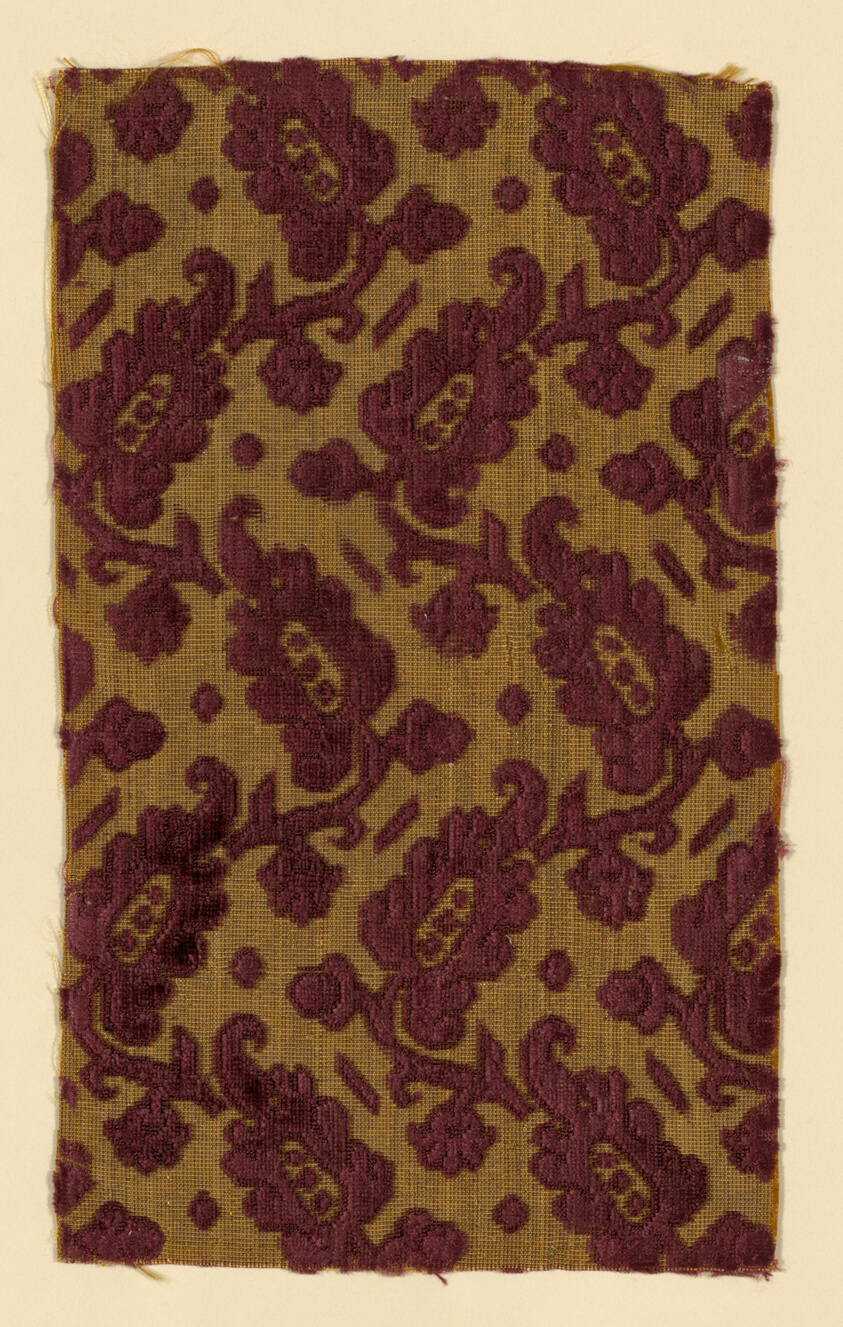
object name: Textile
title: Fragment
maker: Italy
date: 1601/25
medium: Silk, cut, uncut, voided velvet with additional patterning wefts of gilt string against plain weave foundation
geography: Italy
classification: textile; weaving - velvet